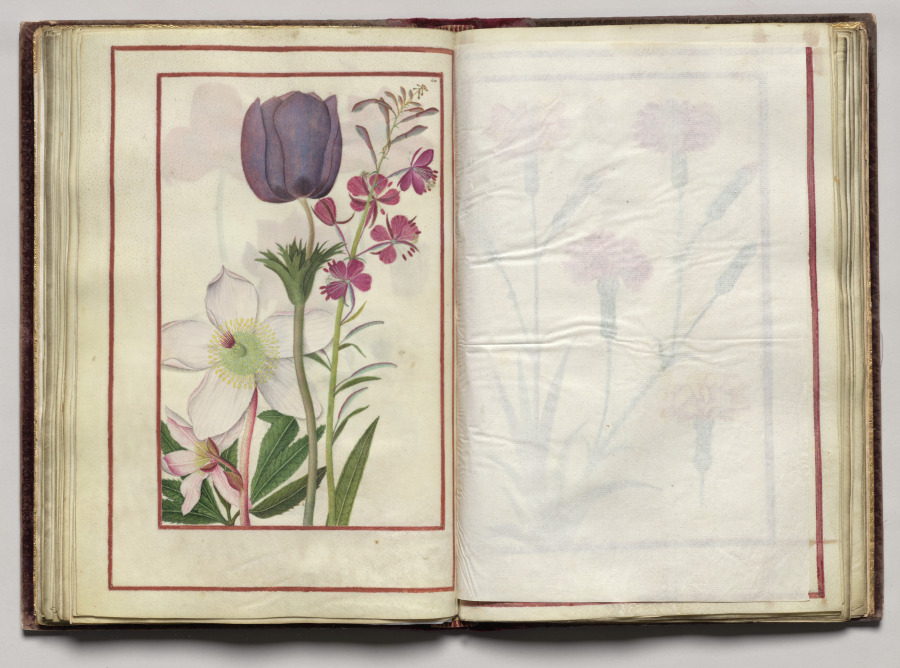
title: Anemones and Hellebore, folio 30 (verso), from Florilegium (A Book of Flower Studies)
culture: France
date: 1608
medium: watercolor, ink, silver, and gold over occasional traces of pencil, on vellum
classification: Bound Volume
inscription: Dated: Poitiers 1608 (on frontispiece) Signed: On frontispiece in black ink, lower right: Van Kuyk Notation on drawing: Frontispiece: in pencil, lower margin: * élève de Van Kessel, peintre flammand (* in pencil also appears in front of Van Kuyk's name).